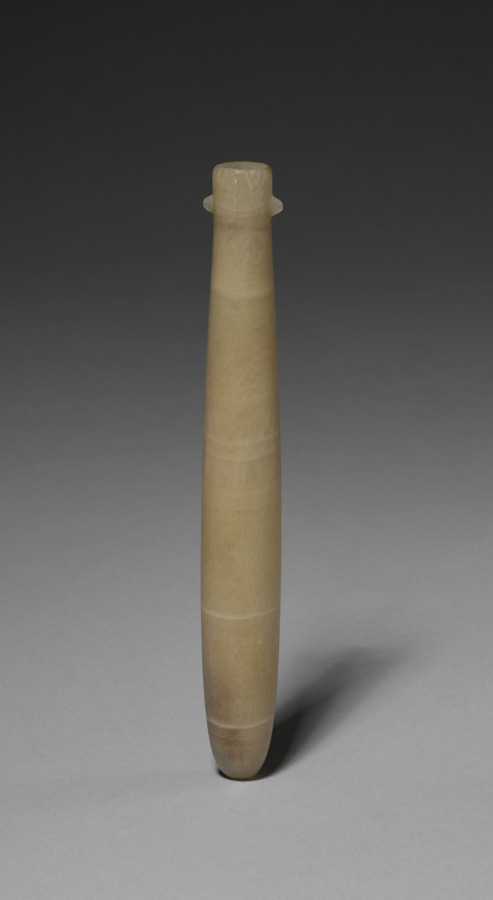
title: Alabastron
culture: Egypt, Greco-Roman period (332 BCE–395 CE), Ptolemaic dynasty (305–30 BCE)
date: 305–222 BCE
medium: travertine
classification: Vessels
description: Both ancient Egyptian men and women loved cosmetics. Unguents, oils, and perfumes made from aromatic plant resins and gums were obtained at great cost from distant lands. The objects identified with cosmetics were given lavish treatment.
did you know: This perfume holder might have been attached to a string, making it easily portable.